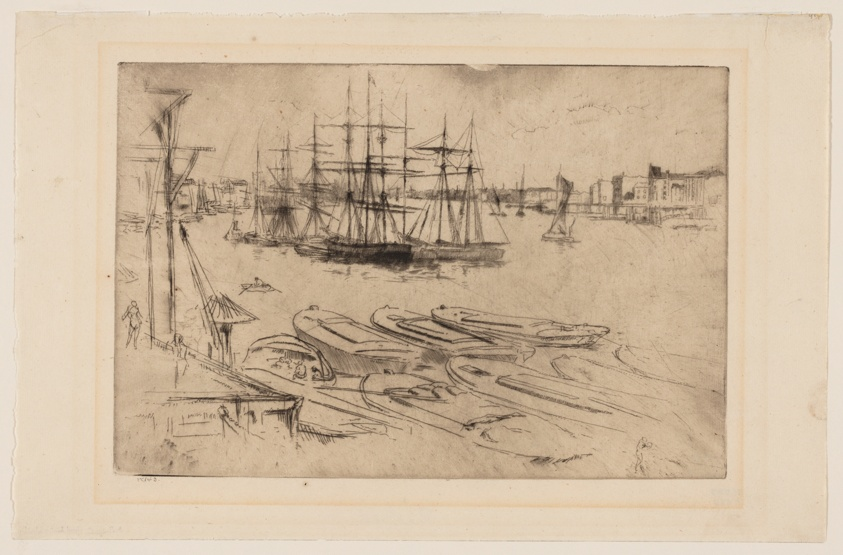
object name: Print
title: Wapping - The Pool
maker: James McNeill Whistler (American, 1834-1903)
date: 1878/79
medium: Etching and drypoint in black ink on ivory laid paper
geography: United States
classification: etching; drypoint; print; prints and drawing; paper